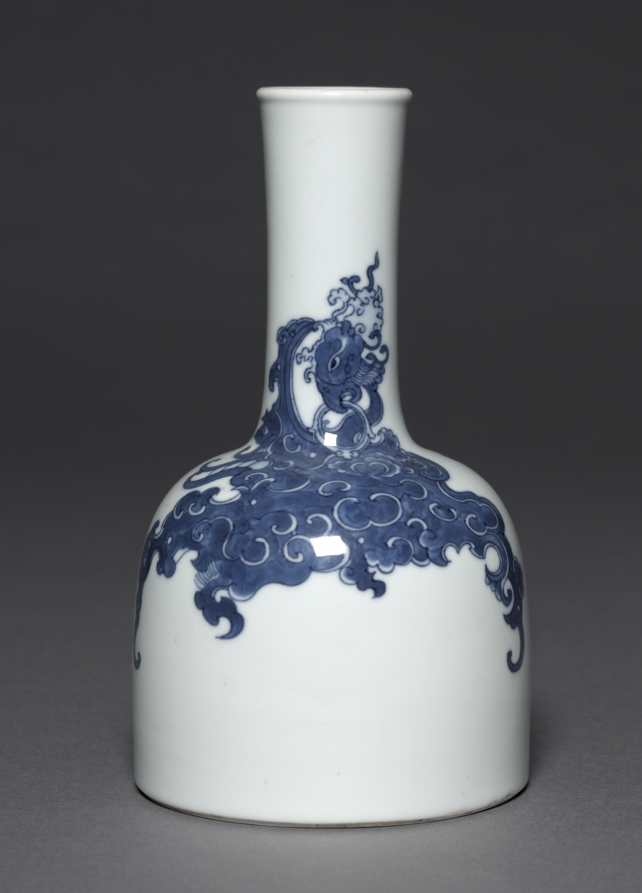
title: Mallet-Shaped Bottle with Phoenixes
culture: China, Jiangxi province, Jingdezhen, Qing dynasty (1644-1911), Kangxi mark and period (1662-1722)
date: 1662–1722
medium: porcelain with underglaze blue decoration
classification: Ceramic